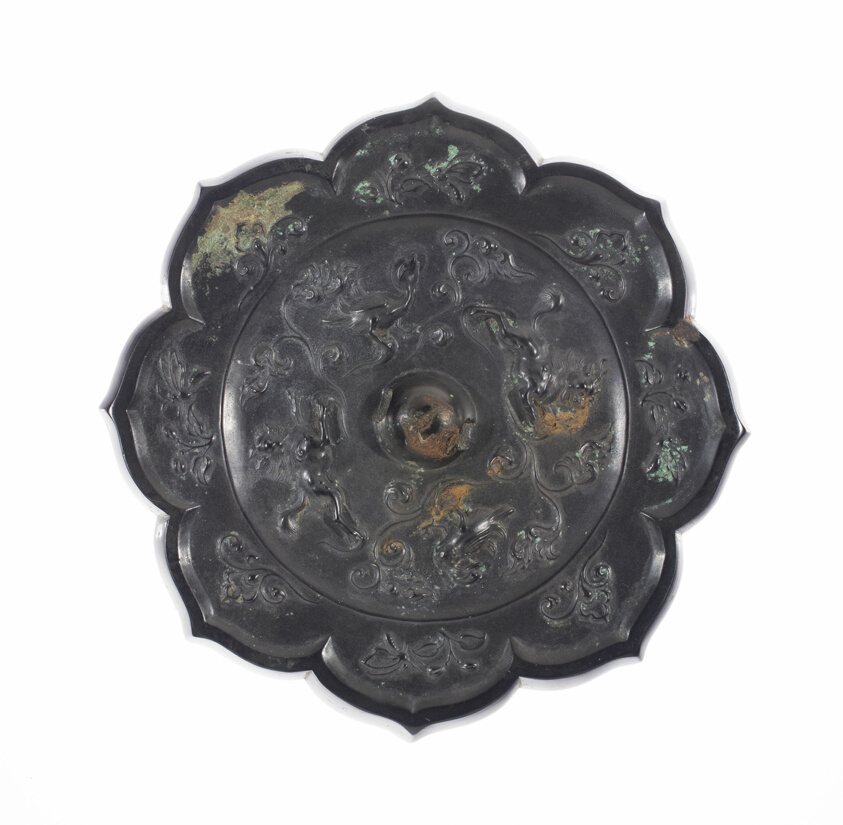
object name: Decorative Arts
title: Lobed Mirror with Birds, Lions, and Floral Sprays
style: Chinese (culture or style)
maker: China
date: Tang dynasty (A.D. 618–907), 8th century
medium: Bronze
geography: China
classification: bronze; metal; mirror; asian art; decorative arts